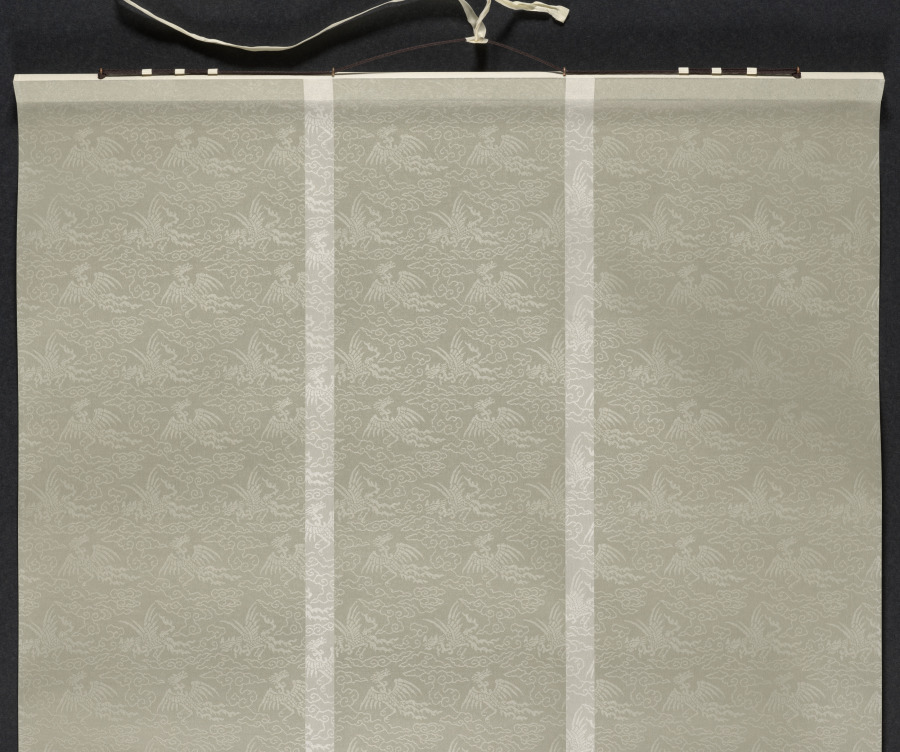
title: Quails and Sparrows in an Autumn Scene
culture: China, Yuan dynasty (1271-1368)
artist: Wang Yuan (Chinese, c. 1299-after 1366)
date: 1347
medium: hanging scroll, ink on paper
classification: Painting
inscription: 至正丁亥春 錢塘王淵若水寫秋景鶉雀圖 [印] 澹轩; [印] 若水; [印] 墨妙筆精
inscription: 翦翦輕風搖翠葆，團團清露滴金叢。 劍南畫手今何在，冷落賓榔枸杞新。 鐵篴 [印] 杨维桢印; [印] 廉夫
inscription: 1 inscription and 10 seals of the Qianlong emperor (r. 1736-95)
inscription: 4 seals of Zhang Heng 張珩 (1915-1963)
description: The flower-and-bird subjects here are depicted in a meticulous manner, echoing the academic tradition but translating the customarily colored images to plain monochrome. Fine ink lines combined with carefully graded washes define the contours and give subtle modeling to the natural forms. Wang Yuan excelled in flower-and-bird subjects as well as landscape and figure paintings. A child prodigy, he was instructed by the great Yuan master Zhao Mengfu at an early age.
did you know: Wang Yuan was from Qiantang, today’s Hangzhou in eastern China.